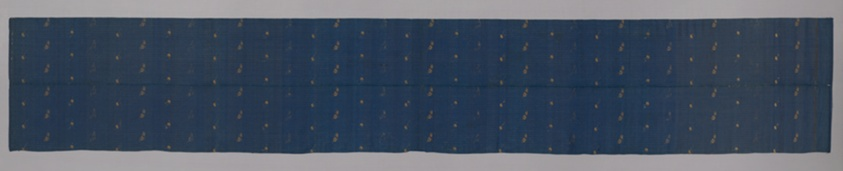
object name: Textile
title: Obi (Belt)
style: Japanism, meiji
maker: Japan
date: Meiji period (1868–1912), 1875/1900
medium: Silk and gold-leaf-over-lacquered-paper strip, plain weave with plain interlacings of secondary binding warps and supplementary patterning wefts; both selvages present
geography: Japan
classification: textile; weaving; obi (sash)